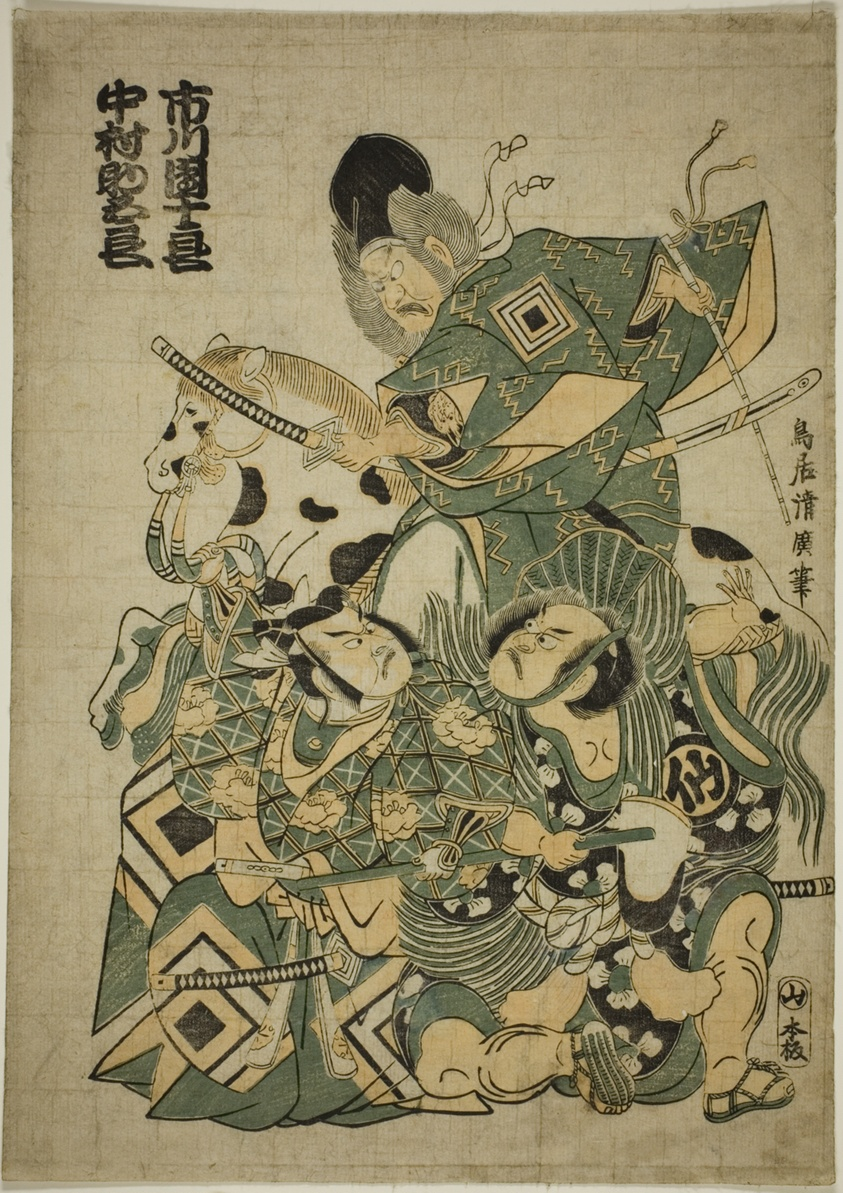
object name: Print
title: The Actors Ichikawa Ebizo I as Miura Osuke, Ichikawa Danjuro lV as Okazaki Akushiro, and Nakamura Sukegoro I as Kato Arajiro in the play "Miura no Osuke Bumon no Kotobuki," performed at the Nakamura Theater in the eleventh month, 1754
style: Japanese (culture or style)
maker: Torii Kiyohiro (Japanese, active c. 1737-76)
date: 1754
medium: Color woodblock print; oban, benizuri-e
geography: Japan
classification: woodblock print; print; asian art